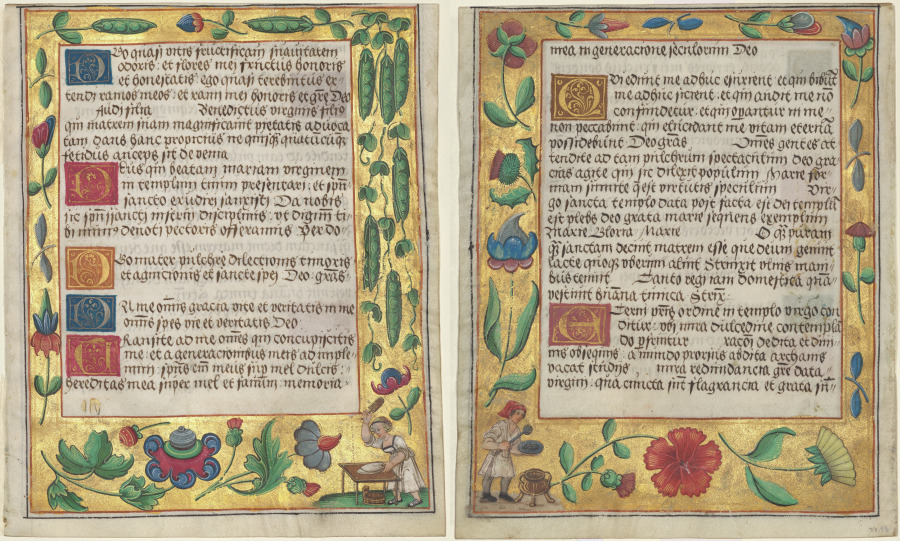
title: Leaf from a Psalter and Prayerbook: Ornamental Border with Pea Vines and a Girl Kneading Bread (recto) and Ornamental Boarder with Carnations, a Thistle, and a Cook Ladling Soup (verso) (1 of 3 Excised Leaves)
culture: Germany, Hildesheim(?), 16th century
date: c. 1524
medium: ink, tempera and liquid gold on vellum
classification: Manuscript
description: This leaf and others in the collection were excised from the same prayer book. They reveal the charm of secular decoration such as satyrs or domestic activities like cooking. Such details would have been a sumptuous delight to the original owner. The original book was a highly personalized volume apparently written and illuminated in North Germany as suggested by internal textual references. The prominent inclusion of Saint Godehard (died 1038), Bishop of Hildesheim, in the calendar (not visible) would suggest that the manuscript was produced in that city.